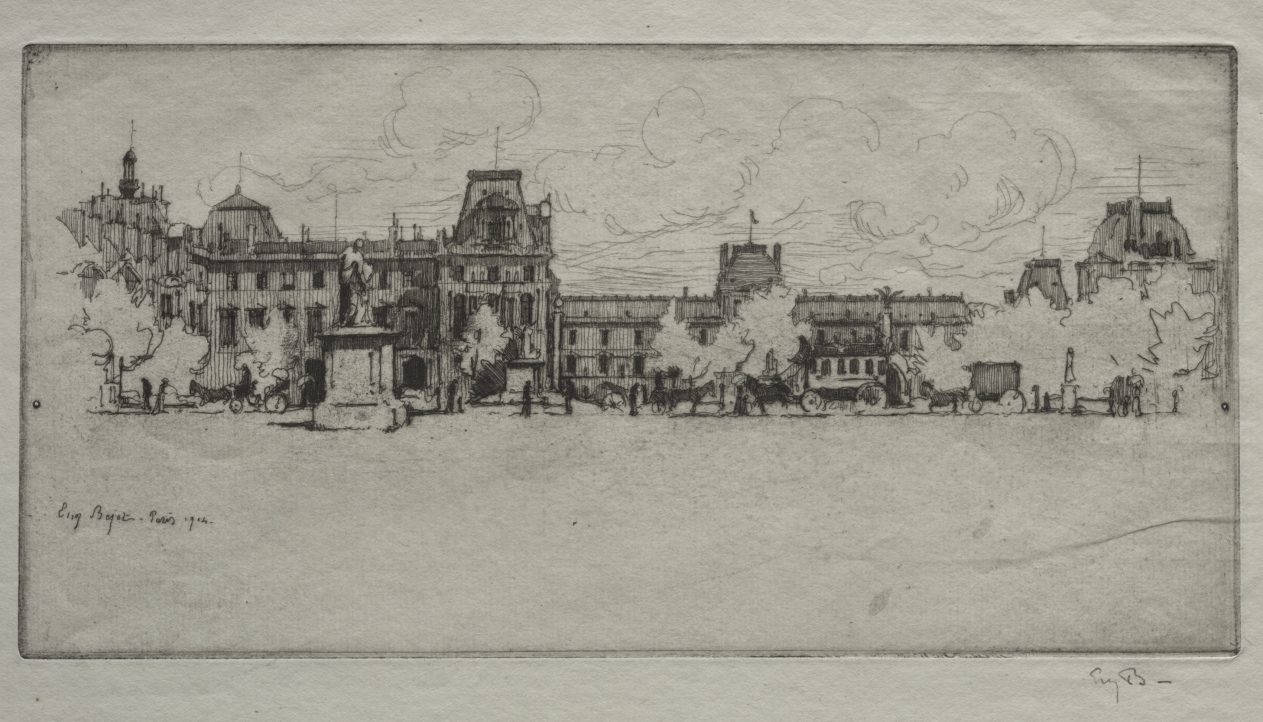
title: Les Tuileries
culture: France, 20th century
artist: Eugène Bejot (French, 1867–1931)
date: 1904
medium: etching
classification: Print